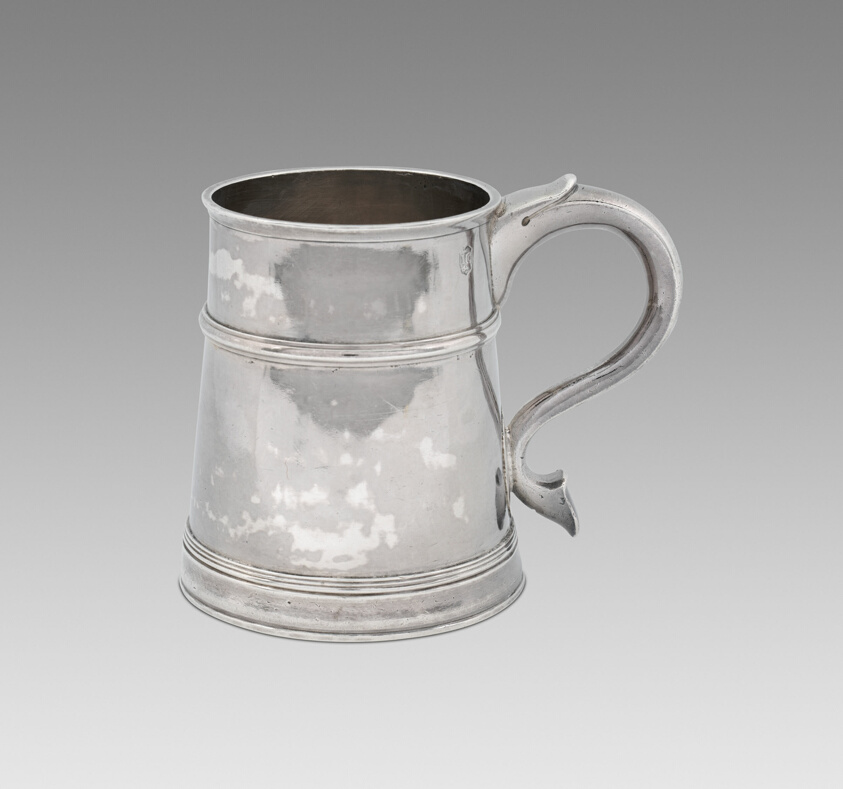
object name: Metalwork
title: Mug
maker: John Coney; American, 1655–1722; Boston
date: 1705–15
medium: Silver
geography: Boston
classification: drinking vessel; silver; american decorative arts; american arts; decorative arts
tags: dining, drinking